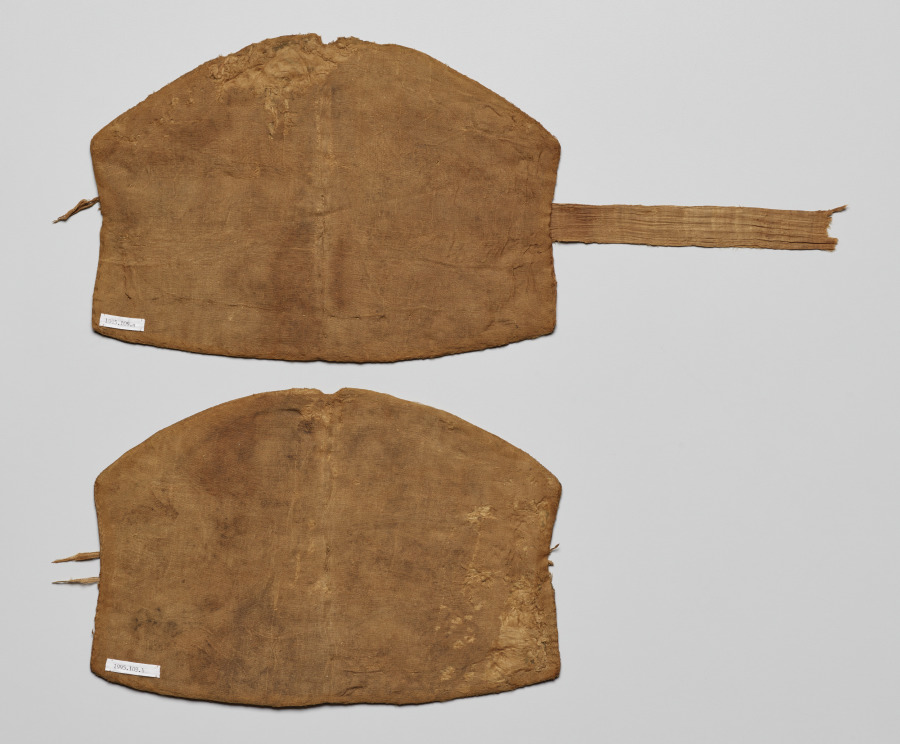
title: Pair of Headpieces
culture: China, Liao dynasty (907-1125)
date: 907–1125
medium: embroidery, silk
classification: Embroidery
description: These headpieces are embroidered with butterflies, birds, animals, flowers, leaves, and delicate vine scrolls. In general, the design is related to the theme of the lotus pond, best known from Liao tomb paintings. Paired ducks or geese swimming in water and looking in opposite directions seem to have become popular in the north of China before spreading further south and to Central Asia. On the other hand, recumbent animals looking back are a Central Asian image that migrated to northern China. Headpieces of this shape, intersected by two bands and secured by ties, have a long history in northern China. A gold replica was found in a tomb dating as early as 500–550.